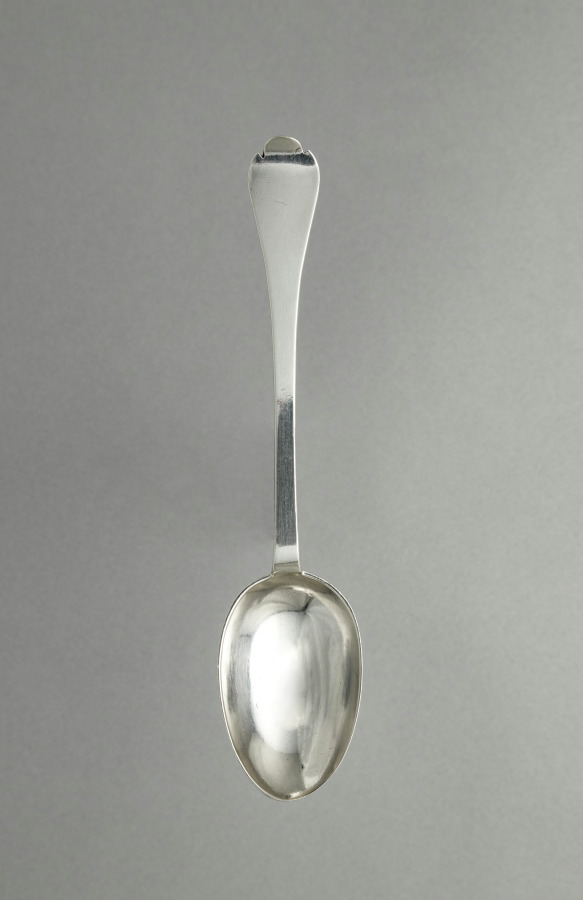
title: Tablespoon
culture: America, Rhode Island, Newport, 18th century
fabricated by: Samuel Vernon (American, 1683–1737)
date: c. 1705–1715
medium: silver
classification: Silver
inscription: engraved "H" over "I+M" in cross-hatched block letters on back of handle end.